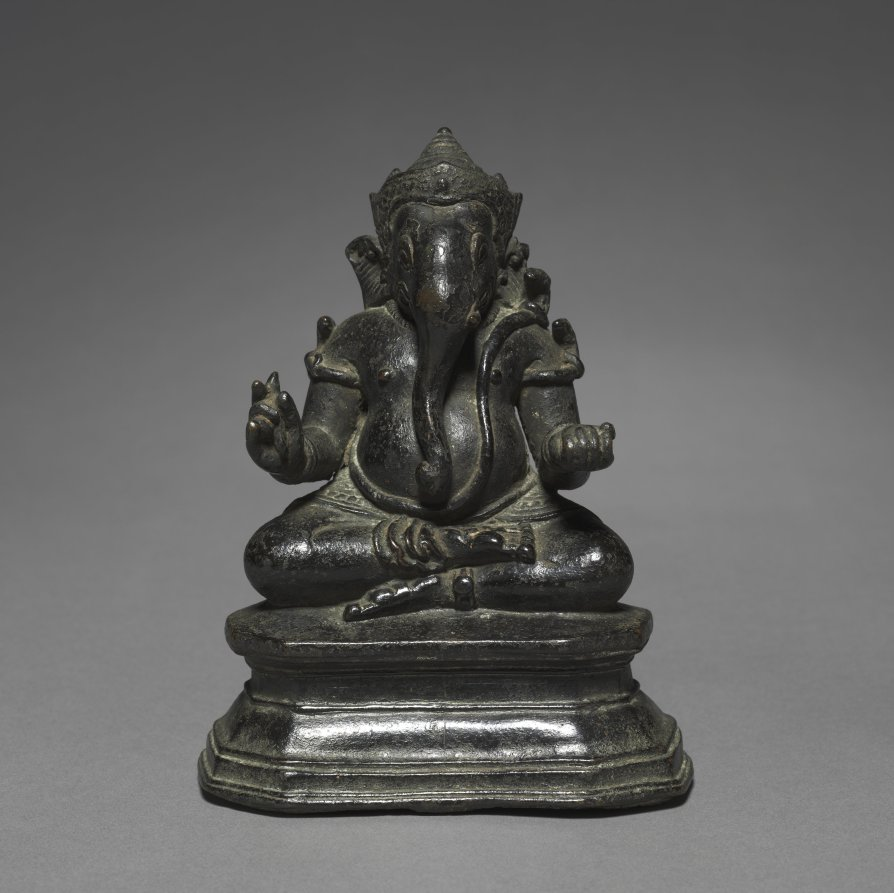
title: Seated Two-armed Ganesa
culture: Cambodia, Angkor Wat Period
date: late 1100s-early 1200s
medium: bronze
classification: Sculpture